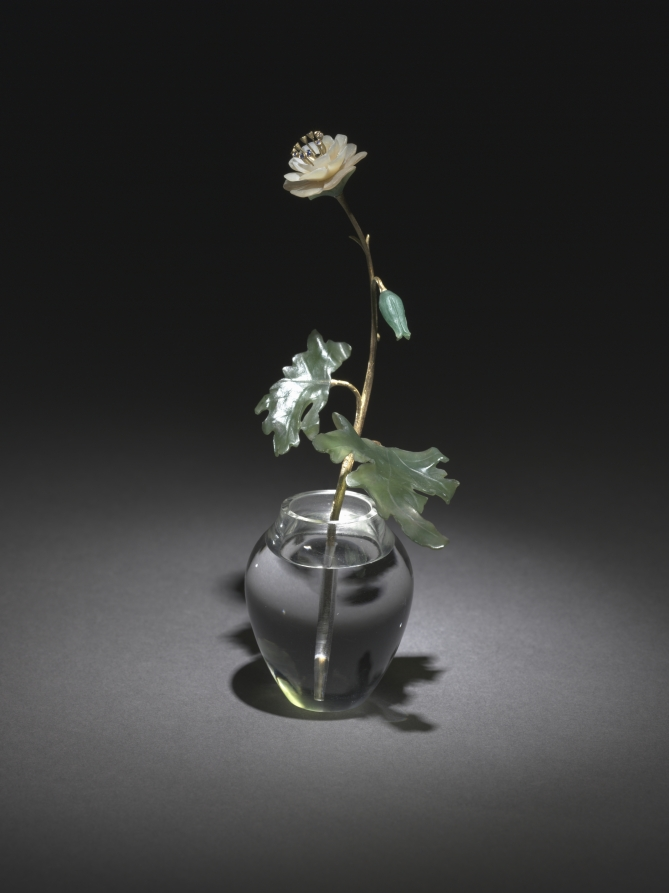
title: Flower Study of an Anemone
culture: Russia, St. Petersburg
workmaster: Henrik Wigström (Russian, 1862–1923)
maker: House of Fabergé (Russian, 1842–1918)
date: c. 1905–15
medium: mat white stone, gold, sapphires, jade, rock crystal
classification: Miscellaneous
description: This flower study depicts a wild anemone in bloom. Fabergé’s inspiration for his flower studies is said to have come from the floral brooches of precious stones that were made in the 1700s for Catherine the Great as well as from the Japanese art of flower arranging, known as ikebana. Small and delicate, Fabergé’s flower studies were given as intimate gifts to friends by the tsarina and others in the court. She also liked to take them around to wherever the imperial family was residing as a reminder of spring during the harsh Russian winters.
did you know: The stems of Fabergé’s flower studies are set into little basins carved from rock crystal to resemble pots of water.